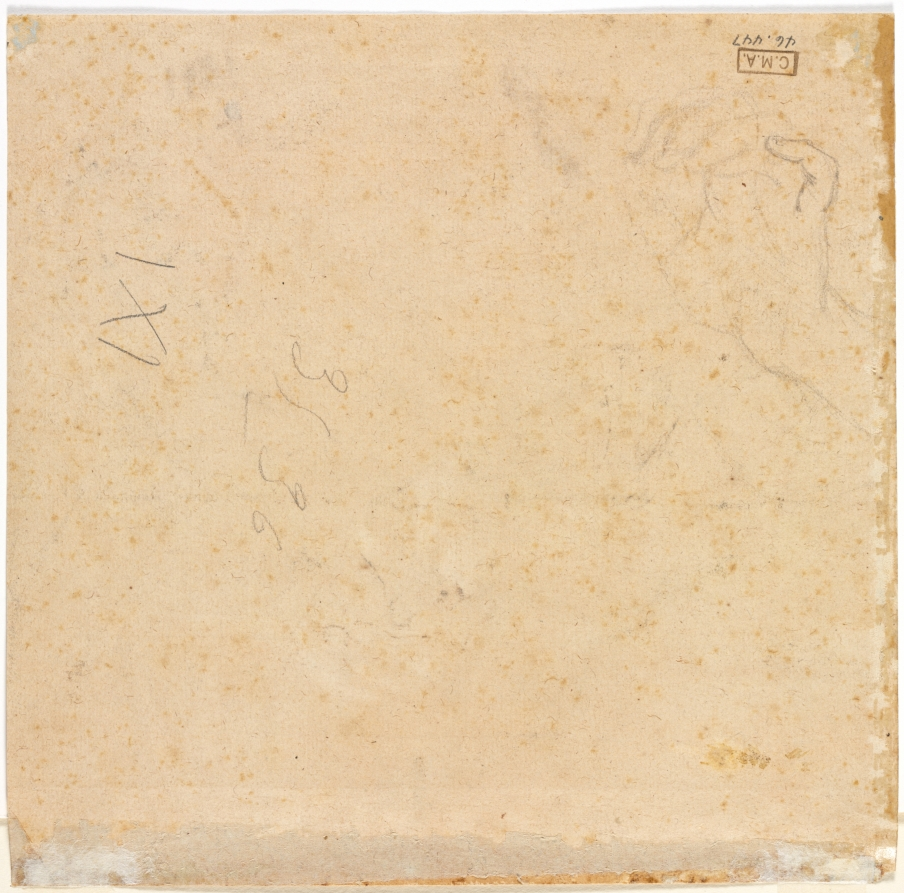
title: Sketch of a Hand (verso)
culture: France, 18th century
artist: Pierre Lenfant (French, 1704–1787)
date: 1700s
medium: black chalk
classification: Drawing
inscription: center left, in graphite: 35_36 [sideways] ; center left, in graphite: IXI [sideways]